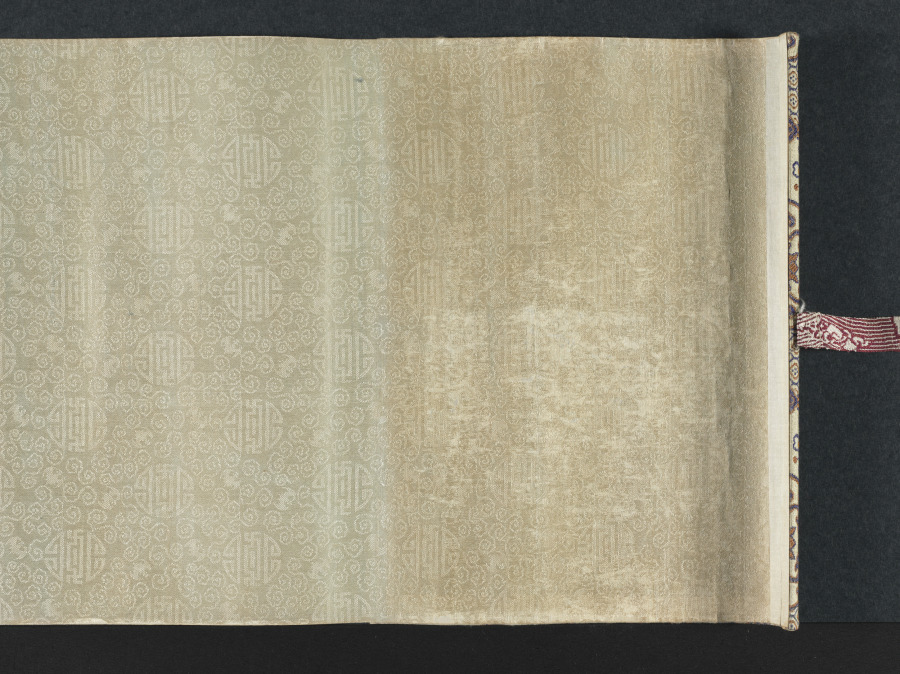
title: Saying Farewell at Xunyang (Song of the Pipa)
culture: China, Ming dynasty (1368–1644)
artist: Wen Boren (Chinese, 1502–1575)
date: 1500s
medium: handscroll, ink and color on paper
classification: Painting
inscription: "潯陽送客圖" 五峰山人文伯仁寫于停雲館中 [印] 文伯仁; 五峰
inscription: 2 colophons and 9 additional seals: 1 transcription of "Pipa xing 琵琶行” (Song of Pipa) and 3 seals of Zhu Yizun 朱彜尊 (1629-1709); 2 seals of Wu Rongguang 吳榮光 (1773-1843); 1 colophon, dated 1826, and 3 seals of Wu Xijia 吳錫嘉 (mid-1700s)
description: This handscroll depicts The Song of the Pipa, a poem by Bai Juyi 白居易 (772–846) written after the poet’s encounter with a pipa player on the Yangzi River. Expelled from her home city when her beauty and fame had faded, she played for the poet at night. Her musical performance and tragic life story resonated with Bai Juyi, who had just been demoted and exiled from life at court himself. The hazy, vast view and pale color tonalities of this painting illustrate these feelings of endless sadness, having lost one’s sense of purpose in life.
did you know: Wen Boren depicted the chilly autumn water with a fishnet pattern.